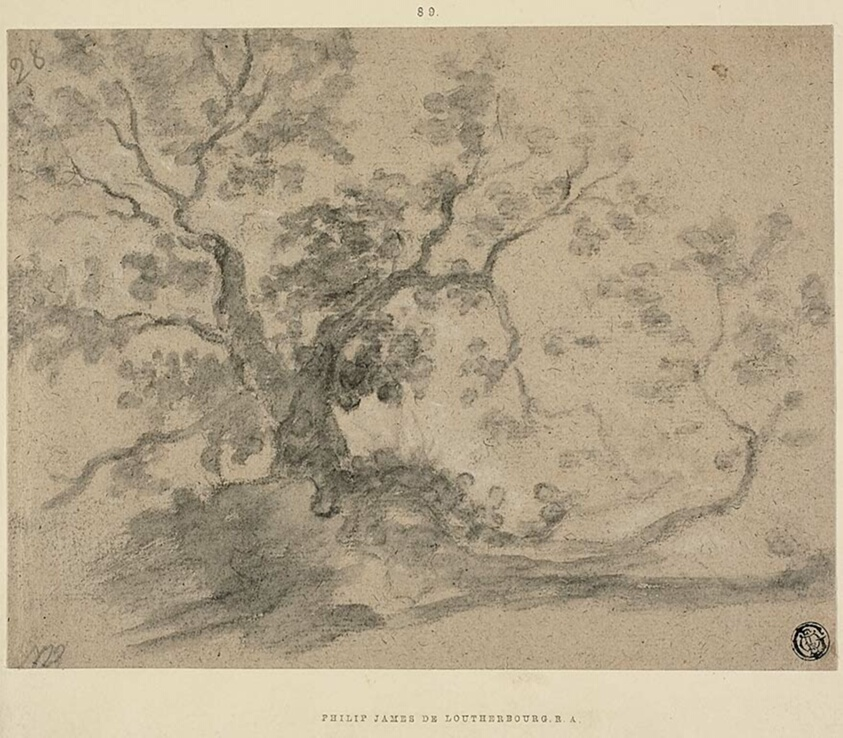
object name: Drawing and Watercolor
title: Trees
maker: Philip Jacques de Loutherbourg; French, 1740-1812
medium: Charcoal, with stumping and touches of brush and gray wash, heightened with white chalk, on tan laid paper, perimeter mounted on cream wove card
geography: France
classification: charcoal; drawings (visual works); prints and drawing